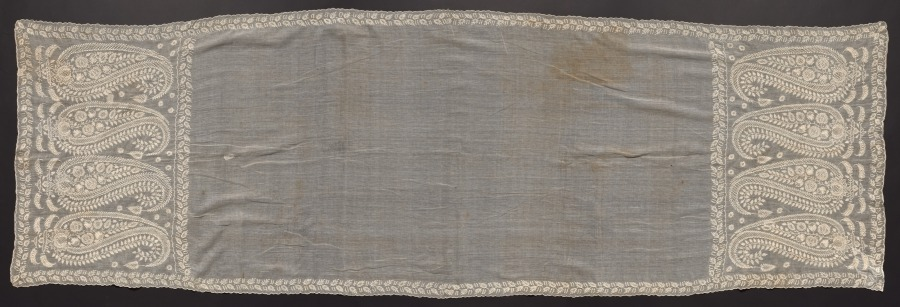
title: Embroidered Scarf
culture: Madeira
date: 1800–1820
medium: Plain weave cotton (est.): embroidered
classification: Embroidery